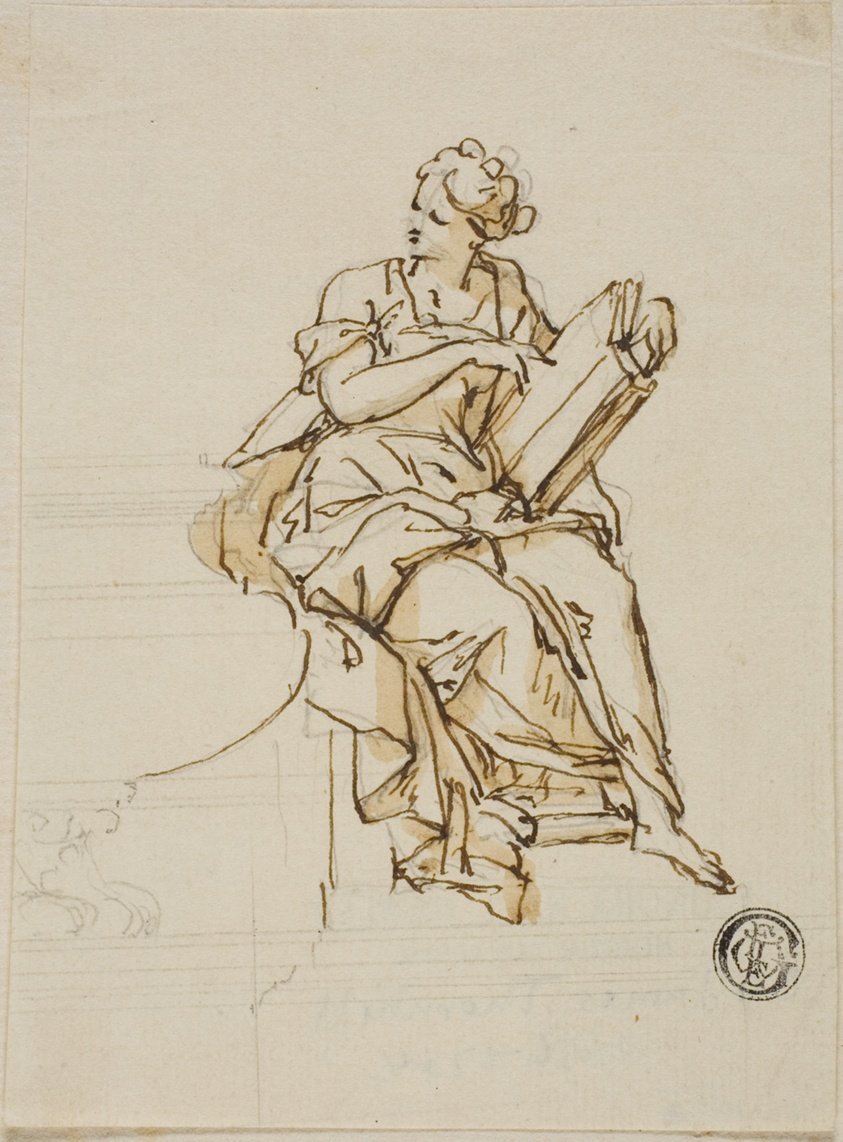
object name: Drawing and Watercolor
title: Wisdom: Unexecuted Design for the Monument to the First Duke of Marlborough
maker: John Michael Rysbrack (Flemish, 1693-1770)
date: c. 1733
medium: Pen and brown ink, with brush and brown wash, over graphite, on cream laid paper, tipped onto ivory laid paper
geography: Flanders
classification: pen and ink drawings; drawings (visual works); prints and drawing